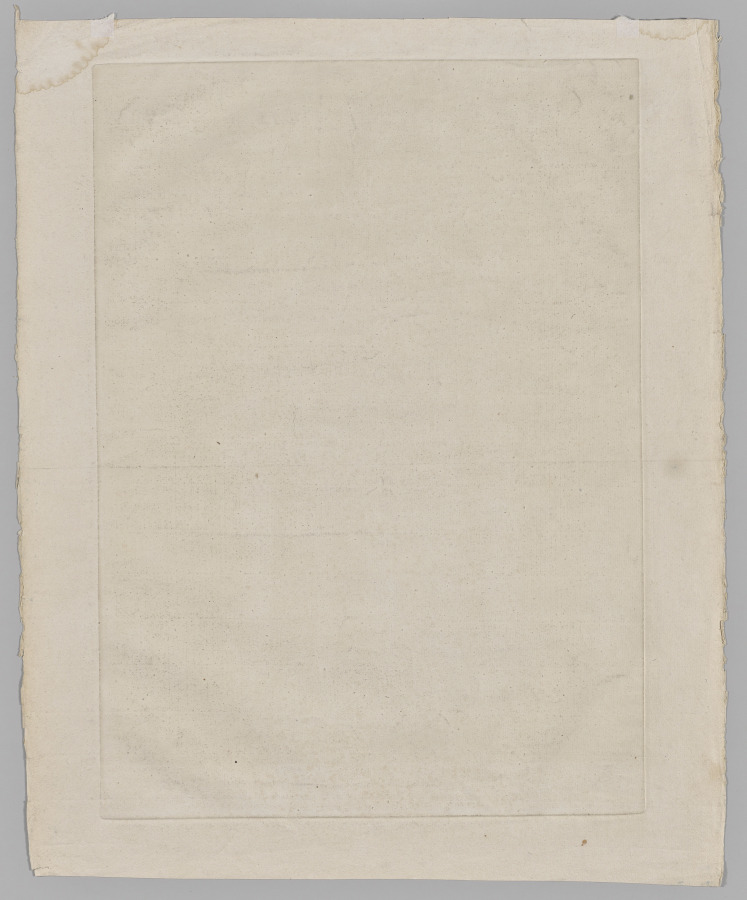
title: A View of the Vestibule of St. Peter at Rome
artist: Georges Francois Blondel (French, 1730–1800)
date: 1766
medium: mezzotint printed in black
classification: Print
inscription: Imprinted on rect: “A View of the Vestibule of St. Peter at Rome”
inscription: Imprinted on recto: “G.F. Blondel Delin & Sculp”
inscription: Imprinted on recto: “To the Rt Honble Elizabeth Countess of Northumberland This Plate is most Humbly Dedicated by her Ladyships most humble Srv’t/Published according to Act by G.F. Blondel Panton Street/GF Blondel/Plate 3”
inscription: Watermark: Grand-Jésus stock of T. Dupuy, watermark Name of Jesus (IHS), countermark T Dupuy Fin Auvergne 1742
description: After returning from several years spent in Italy, the French printmaker George-Francois Blondel settled in London in order to take advantage of the English taste for images of Italian sites. This is one of a series of eight prints he published in 1766 depicting imagined and real Italian interiors. Using the relatively new technique of mezzotint, which creates velvety, dark tonal areas, as well as low vantage points, Blondel created towering, awe-inspiring spaces. For special patrons, he printed the plates in sepia ink, rather than in black; the CMA’s set includes two of these unusual sepia impressions.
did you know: Mezzotint was relatively new at the time this print was made and had yet to be utilized for such large plates of an architectural nature as seen here.